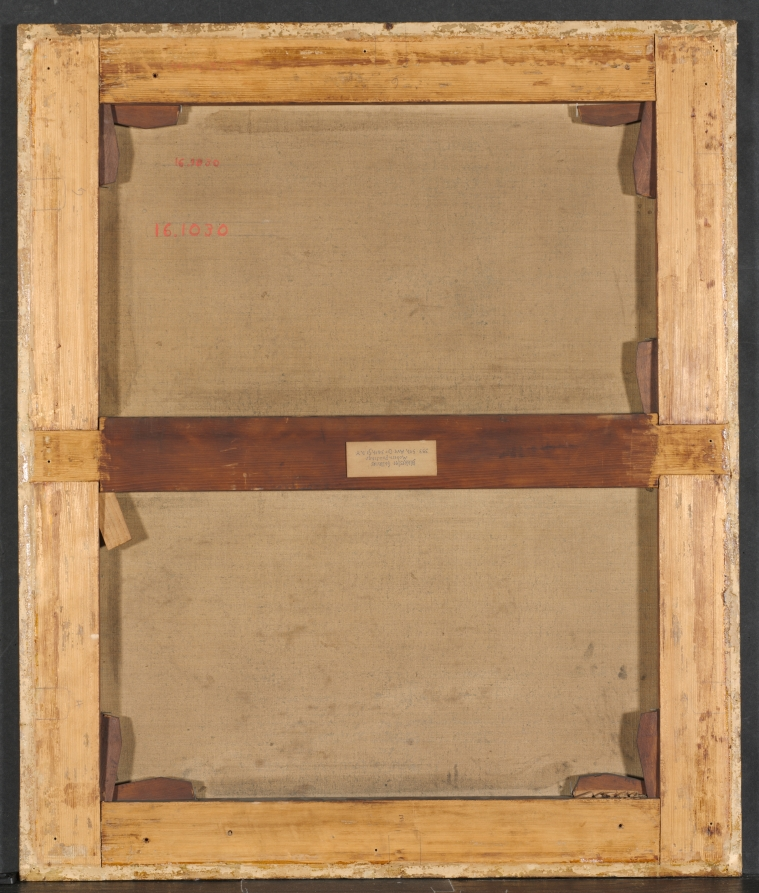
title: Street Singer and Child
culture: England, 18th century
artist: John Opie (British, 1761–1807)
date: 1700s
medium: oil on canvas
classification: Painting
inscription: Inscribed across book: "LOVE/CLOWN (N or R).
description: John Opie's working-class roots made him sympathetic to the plight of the laborer. This painting demonstrates his interest in an honest portrayal of British street life, a sympathy rarely seen in the work of other British artists of his generation, who often presented lower classes more coldly. Much of Britain's population at this time was poor, but beggars and street vendors had a particularly low status. Street singers were often sellers of goods. By focusing the composition tightly on the woman and not including any wares, Opie makes the viewer recognize her humanity; moreover, he emphasizes the connection between mother and child. The singer is working to feed her baby, evoking sympathy from the viewer.